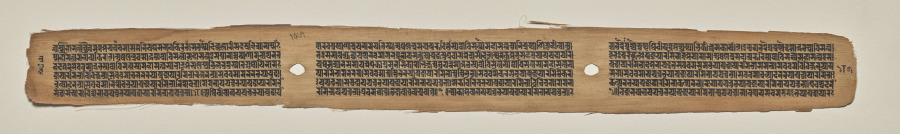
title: Text, folio 185 (verso), from a Manuscript of the Perfection of Wisdom in Eight Thousand Lines (Ashtasahasrika Prajnaparamita-sutra)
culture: Eastern India, Bihar, Vikramashila Monastery. Painting: Nepal, Kathmandu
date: Sunday, September 14, 1119 (year 239 of the Newar Samvat in the month of Ashvina)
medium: gum tempera and ink on palm leaves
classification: Painting